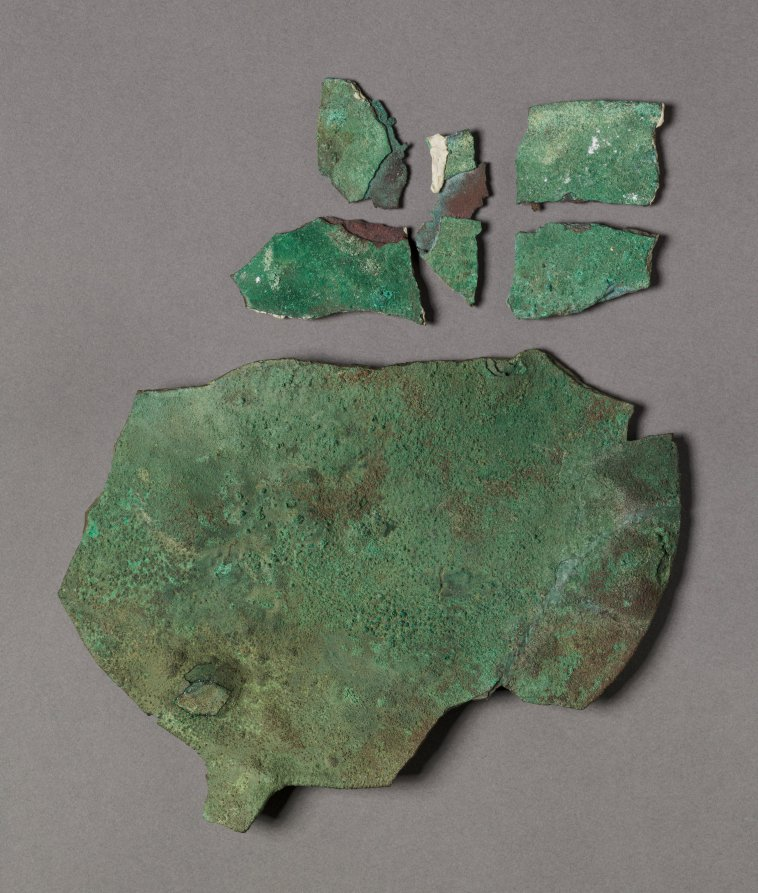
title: Fragment of a Mirror Disk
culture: Egypt, Middle Kingdom (2040–1648 BCE)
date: 2040–1648 BCE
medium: bronze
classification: Cosmetic Objects